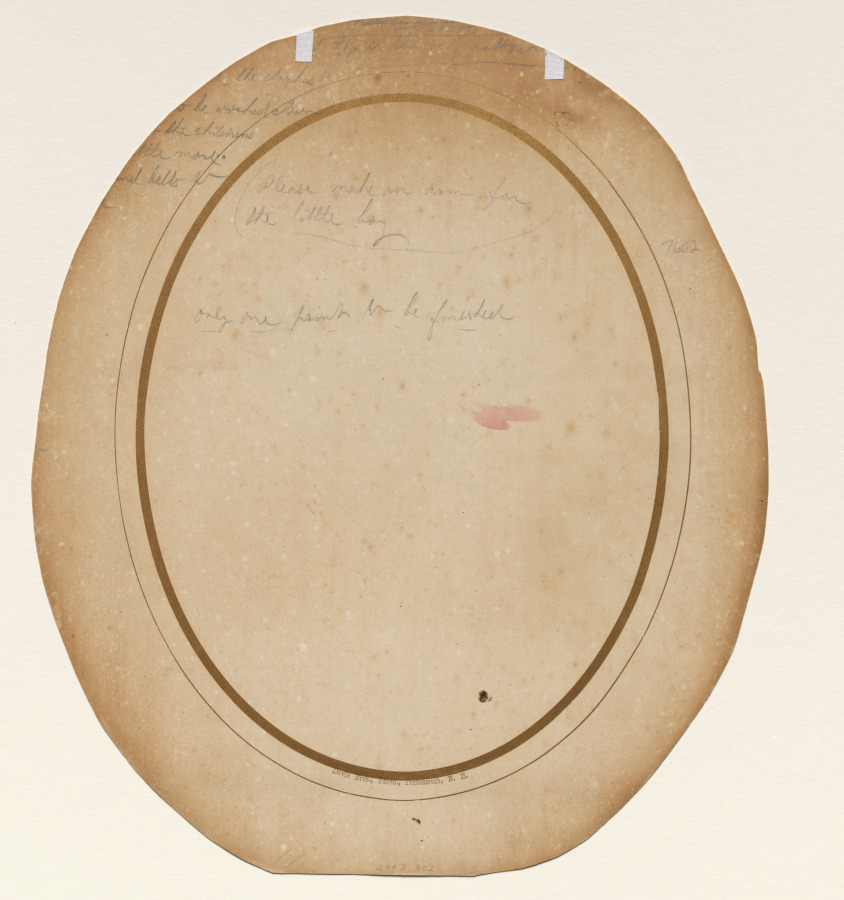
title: Twin Babies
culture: America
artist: Davis Brothers (American)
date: c. 1870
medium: salted paper print, hand-colored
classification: Photograph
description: Color photography was not widely available until the 20th century, but 19th-century photographs could be embellished with hand-applied paints or dyes for an extra charge. Hand coloring, often done by women, usually was limited to adding dabs of pink on lips and cheeks or gold on jewelry, but sometimes, as here, the entire surface would be covered to emulate a painting. The edges of this mount are covered with trial dabs of watercolor that would have been hidden by the mat. Once portraits leave the context of the family, the identities of the sitters are most often lost, as is the case for these twins. Since the Davis Brothers’ studio was in Portsmouth, New Hampshire, around this time, one can assume the twins lived there.